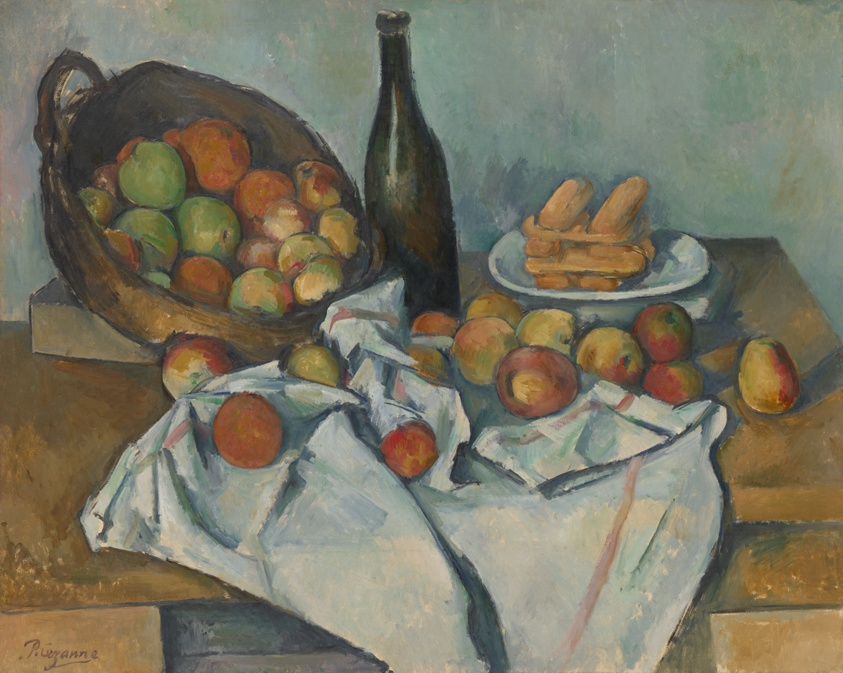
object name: Painting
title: The Basket of Apples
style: Post-Impressionism, 19th century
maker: Paul Cezanne (French, 1839–1906)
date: c. 1893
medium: Oil on canvas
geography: France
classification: oil on canvas; paint; oil paintings (visual works); french; painting; european painting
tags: still life, apples, basket, bottles, Bread, table, tablecloth, food, Century of Progress, world's fairs, Chicago World's Fairs